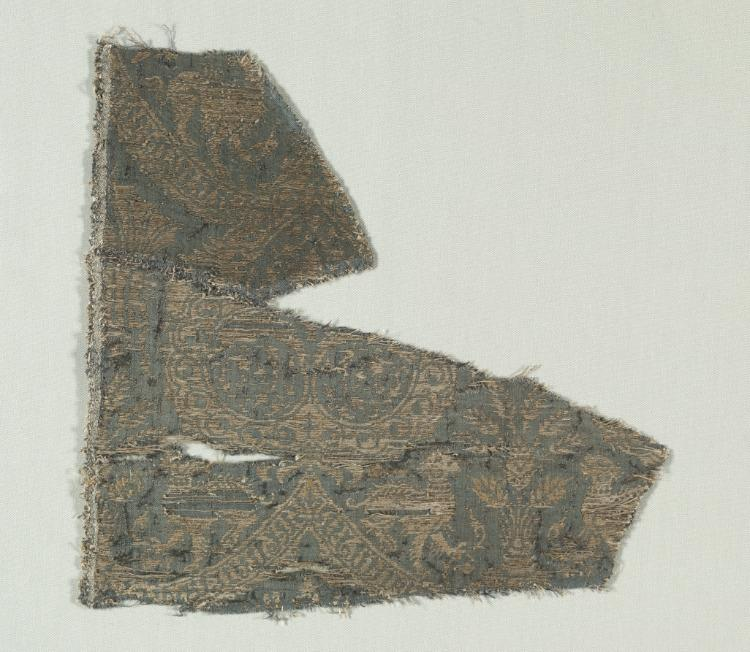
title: Silk with Dogs and Arabic Script in Swaying Bands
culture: Italy, last third of 14th century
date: 1370–1400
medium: silk and silver thread; a combination of two weaves, 2/1 twill and 1/5 twill (lampas)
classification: Textile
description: Arabic script was included in many Italian silk patterns during the 1300s and early 1400s. Usually a few unintelligible but decorative Arabic letters were repeated in the design, but here, the pseudo-Arabic script is prominently displayed in the scalloped bands that support trefoil palmettes. Dogs and birds are incorporated into the pattern in an Italian fashion. During the 1300s and 1400s, Arabic script was featured in luxurious silks woven in Islamic territories, where it symbolized royal power. Spain, Egypt, and to a lesser extent the former Islamic territory of Sicily all produced examples that could have influenced the international silk style created by Italian silk designers. In addition, weavers may also have reinforced the fashion; they migrated from Sicily to the silk-weaving city of Lucca and subsequently to Venice. In Italian painting, pseudo-Arabic script not only decorated the border of the Virgin's mantle, but it was also repeated in silks displayed in the backgrounds.